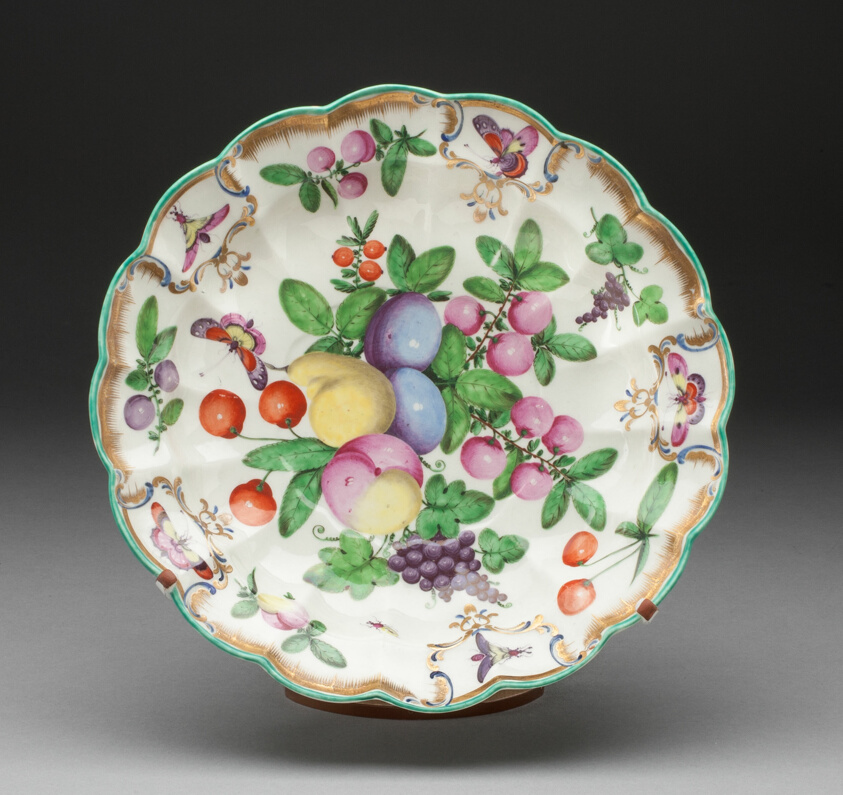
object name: Ceramics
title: Dish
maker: Worcester Porcelain Factory (Warmstry House Period, 1751–1783); Worcester, England, founded 1751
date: 1770/75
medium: Soft-paste porcelain, polychrome enamels and gilding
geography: Worcester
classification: dish (vessel); porcelain; european decorative arts; ceramics